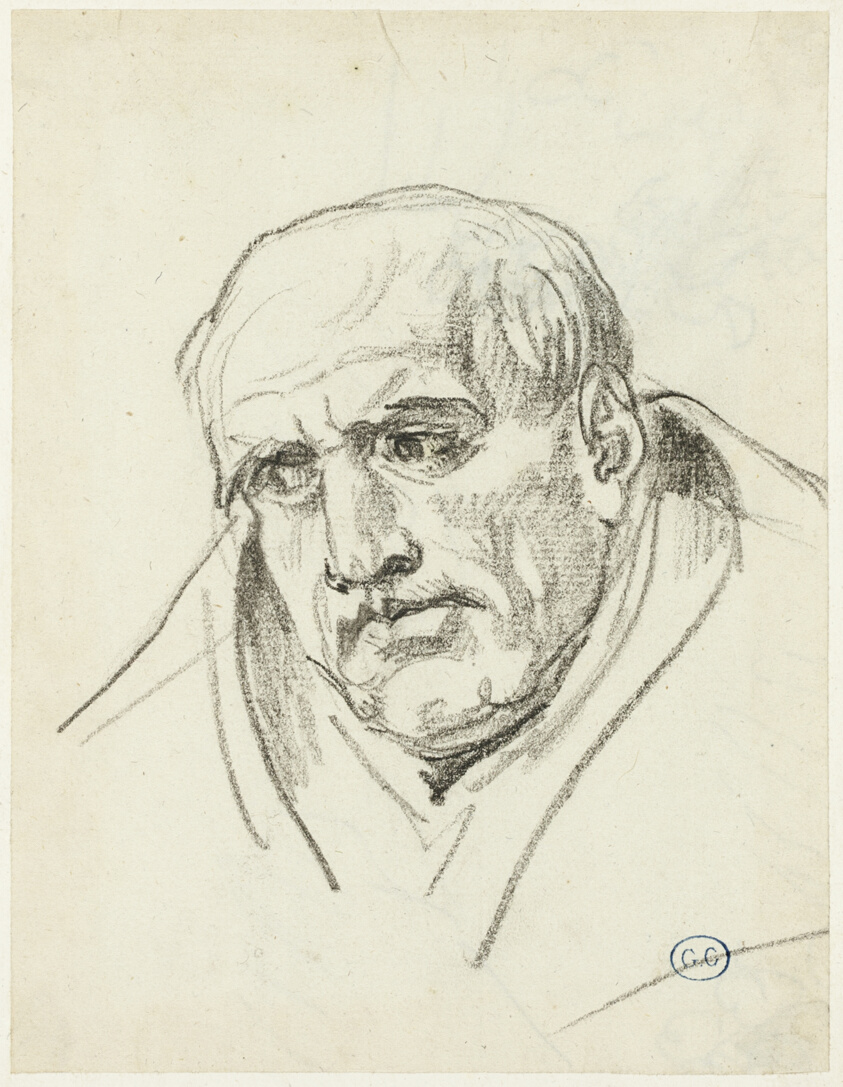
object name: Drawing and Watercolor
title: Bust of an Older Man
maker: Jacques-Louis David; French, 1748-1825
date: c. 1810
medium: Black crayon, on off-white laid paper, edge mounted on cream wove paper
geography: France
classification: drawings (visual works); prints and drawing